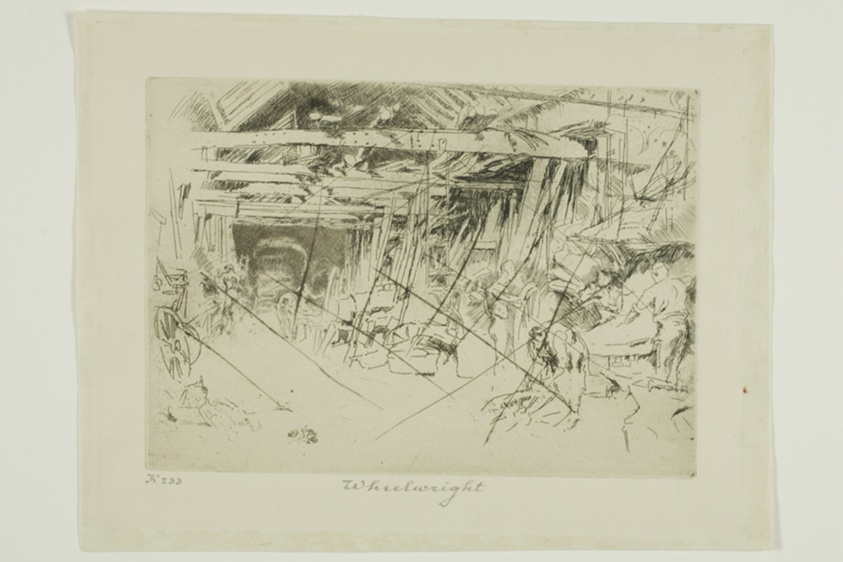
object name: Print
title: Wheelwright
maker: James McNeill Whistler (American, 1834-1903)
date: 1880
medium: Etching and drypoint with foul biting, with drypoint cancellation, in black ink on ivory laid paper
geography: United States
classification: etching; print; prints and drawing; foul biting; drypoint; paper